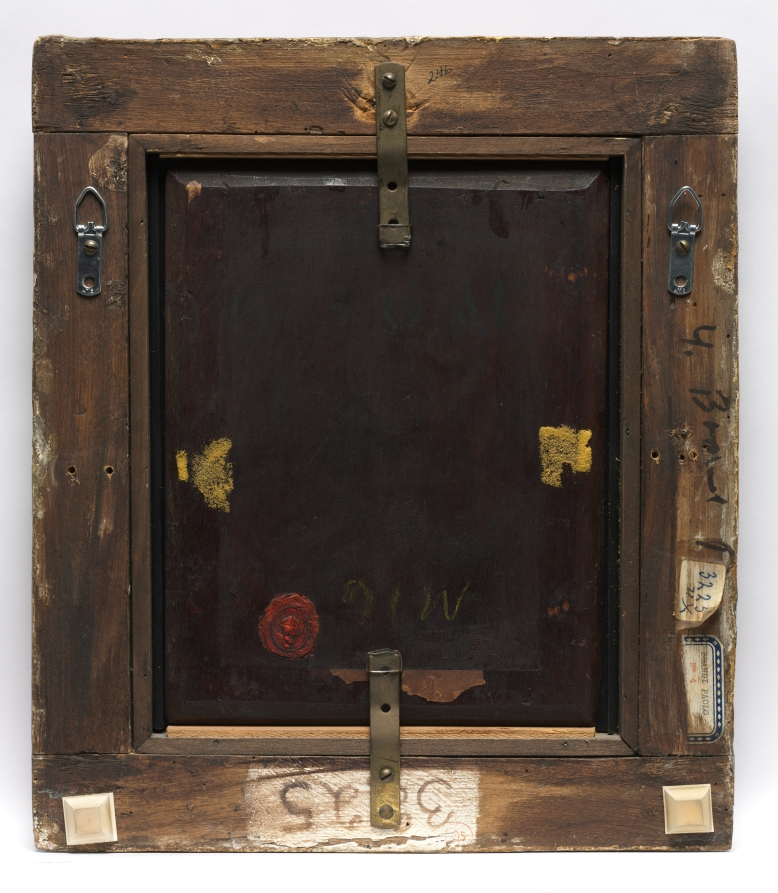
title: Beggars by a Door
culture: Spain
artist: Mariano Fortuny (Spanish, 1838–1874)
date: 1870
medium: oil on panel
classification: Painting